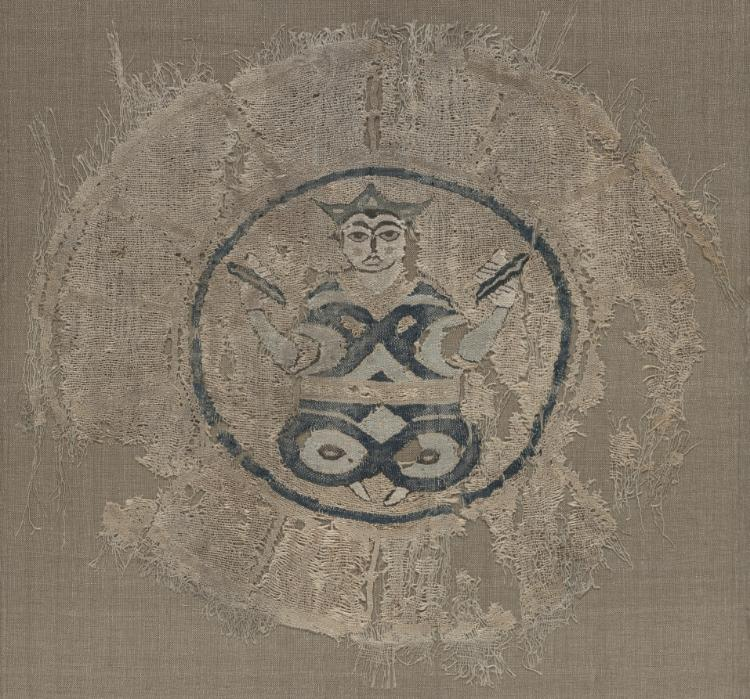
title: Roundel with seated prince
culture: Egypt, Fatimid period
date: 1000s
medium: plain weave with inwoven tapestry weave: linen, silk, and gold filé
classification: Textile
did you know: Within a simple roundel frame a crowned figure is seated holding two objects in his upraised hands.